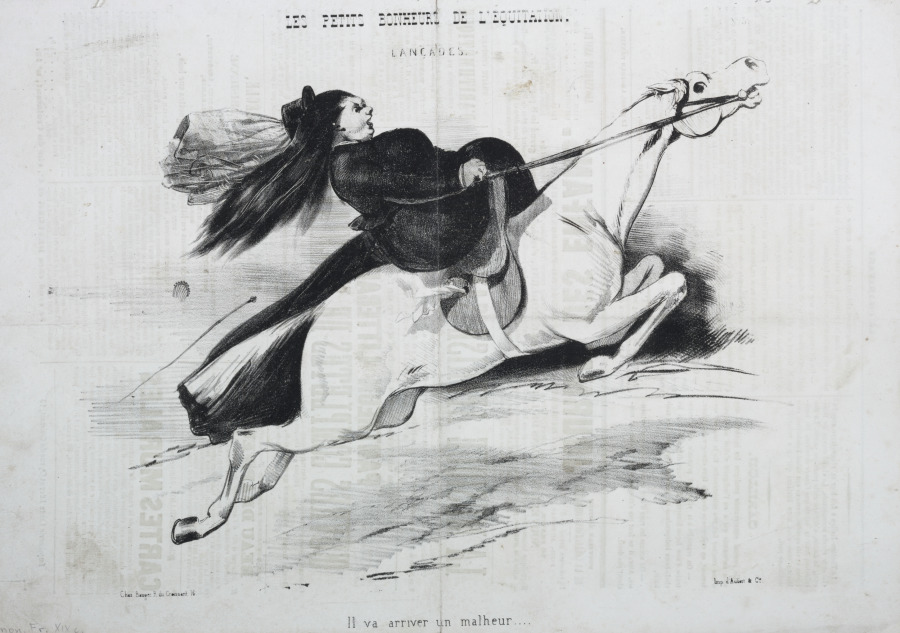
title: Les Petits bonheurs de l'equitation: Lancades. Il va arriver un malheur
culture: France, 19th century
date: 1800s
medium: lithograph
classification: Print